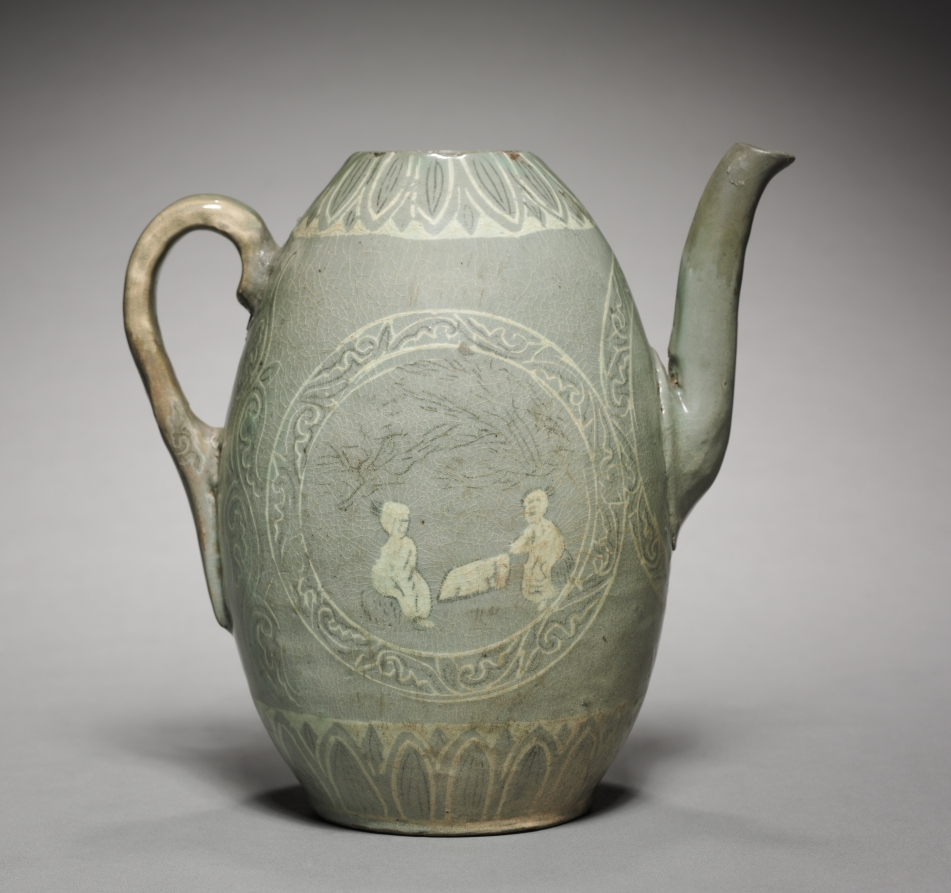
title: Pitcher with Inlaid Figure and Willow Design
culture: Korea, Goryeo dynasty (918–1392)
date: 1200s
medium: celadon ware with inlaid white and black slip decoration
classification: Ceramic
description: Representations of the elite’s elegant gatherings also appear on craft art designs, particularly depictions of the four accomplishments celebrated as cultivated pastimes by the scholar-literati elite—that is, playing stringed instruments and chess, and practicing calligraphy and painting. The image on this rare Korean inlaid celadon of two figures sitting together under a tree is comparable to renderings featuring the accomplishment motif of playing chess, or baduk in Korean.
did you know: As one of the oldest board games invented in China, this East Asian chess is still played in international competition venues.